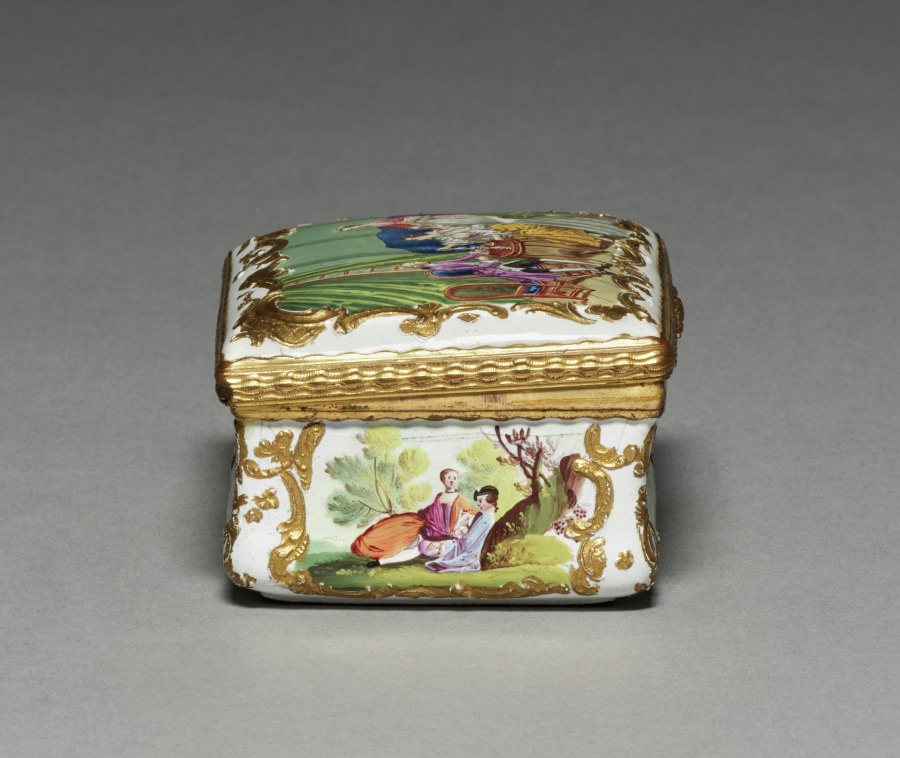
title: Box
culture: England, 18th century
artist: South Staffordshire Factory (British)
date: 1760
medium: enamel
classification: Enamel